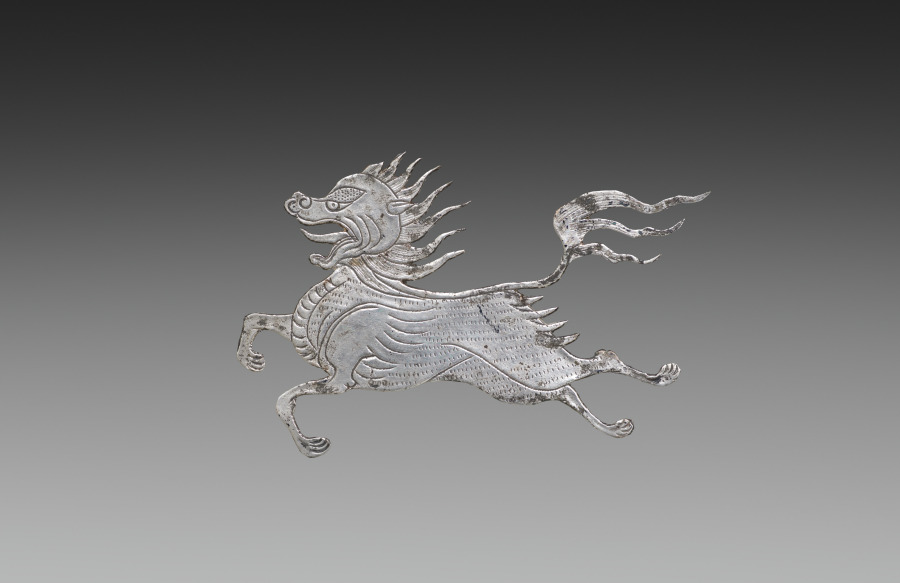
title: Inlay for a Mirror or Box: shih-shih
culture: China, Tang dynasty (618-907) - Song dynasty (960-1279)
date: c. 900–1000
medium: beaten silver with chased details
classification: Metalwork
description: The p'ing-t'o technique of inlaying gold and silver foil on lacquer produced luxurious articles of elegance and fragility. These stray silver inlays were originally mounted on a mirror back or a cosmetic box whose lacquered surface has disintegrated. They combine auspicious symbols of Indian and Chinese origin--human-headed birds whose melodies filled the Buddhist paradise, and bird-riding deities who inhabited the skies of Taoist mythology. Like these imaginary beings, the lions were probably paired in a radial design; at least one has been lost.